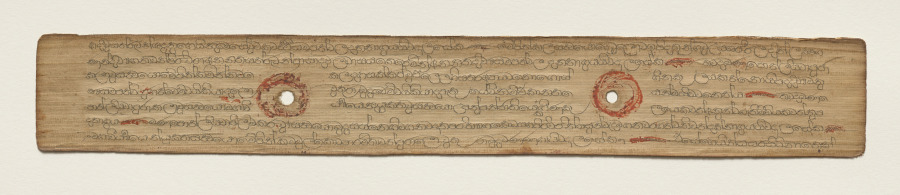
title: Leaf from a Buddhist Manuscript (verso)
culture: Sri Lanka, Singhalese, Late 17th century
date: c. 1700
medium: fiber paper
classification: Manuscript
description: Palm leaf material is still used for manuscripts in Sri Lanka. The palm leaves are prepared first by boiling them, drying them in the sun, and then rubbing them with oils. Scribes then use a metal stylus to incise the text. Then charcoal powder is wiped across the pages, filling in only the inscribed lines.